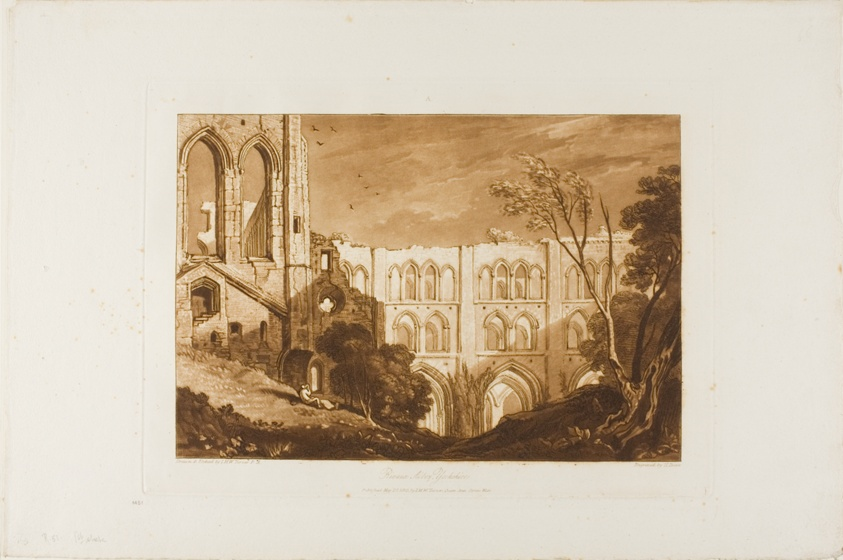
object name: Print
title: Rivaux Abbey, plate 51 from Liber Studiorum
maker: Joseph Mallord William Turner (English, 1775-1851); Engraved by H. Dawe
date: published May 23, 1812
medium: Etching and engraving in brown on off-white paper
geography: England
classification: etching; print; prints and drawing